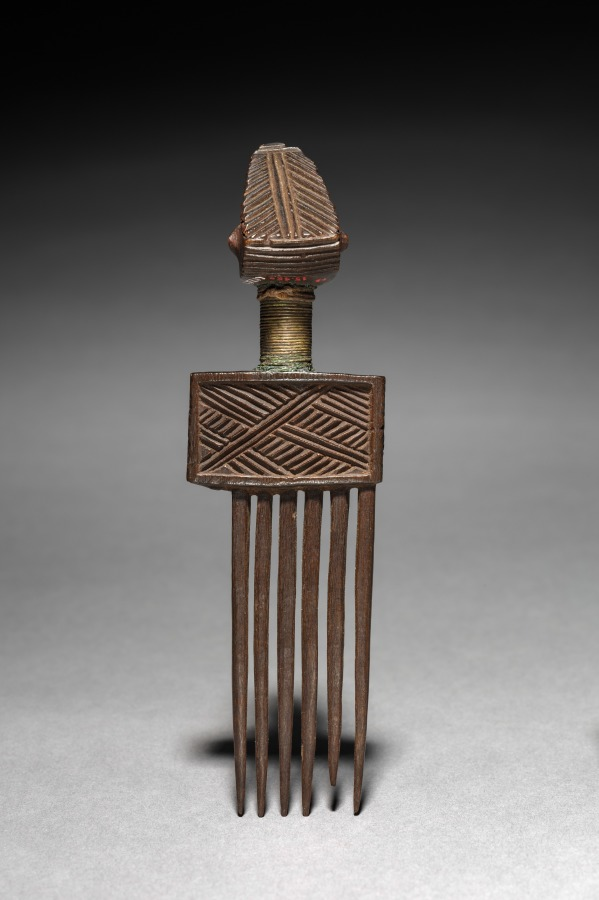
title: Comb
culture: Africa, Central Africa, Democratic Republic of Congo, Luba-style maker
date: c. 1900s?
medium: Wood and wire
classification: Tool